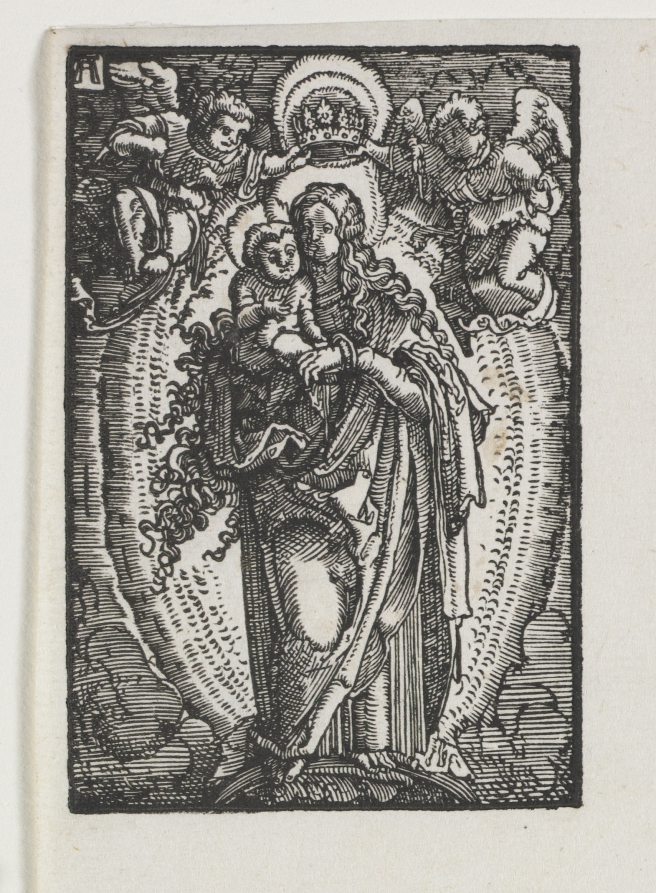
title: The Fall and Redemption of Man: The Virgin as Queen of Heaven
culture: Germany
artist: Albrecht Altdorfer (German, c. 1480–1538)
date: c. 1513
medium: woodcut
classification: Print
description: These eight woodcuts come from a series of forty which illustrate the story of Christian redemption from original sin to the Last Judgement. Probably to maximize printing efficiency and quality, eight woodblocks were printed on each of five sheets of paper, but the subjects are not in the correct chronological order. Prior to sale, the sheets were cut into eight pieces. The sheets in the museum's set were only cut in half, preserving four prints per page. The numbers after the titles of the individual images indicate each scene's place within the narrative. By 1513, Altdorfer had already executed a number of small, finely detailed engravings. Because it is difficult to achieve the same degree of precision using woodcut, The Fall and Redemption of Man is a technical tour de force. Probably inspired by Albrecht Dürer's Small Passion (1511)-but almost double the size-the only contemporaneous comparable set of fine miniature woodcuts, Dance of Death, was designed by Hans Holbein in about 1526 (on view nearby).